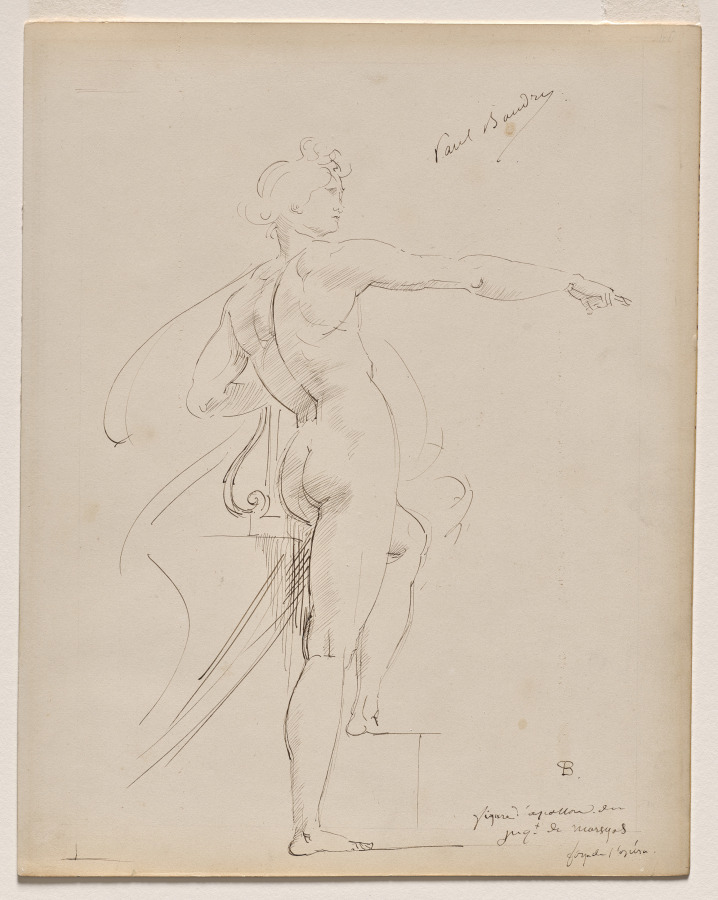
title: Study of Apollo for Marsyas (recto)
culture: France, 19th century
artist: Paul Baudry (French, 1828–1886)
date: late 1860s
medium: pen and brown ink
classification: Drawing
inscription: Monogrammed and inscribed in brown ink, lower right: B / figure d'Apollon du / jugt de Marsyas / foyer de l'opéra. Signed in brown ink, upper right center: Paul Baudry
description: When Paul-Jacques-Aimé Baudry was commissioned to create the ceiling paintings for the Grand Foyer of the new Paris Opéra in 1864, for inspiration he visited the Sistine Chapel frescoes by Michelangelo—completed more than 300 years earlier. This drawing depicts the god Apollo from behind, intended for a scene in which Apollo points to the satyr Marsyas, with whom he held a musical competition. The pose and figure type recall Michelangelo’s monumental sculpture of David, which Baudry would have also seen on his Italian journey.